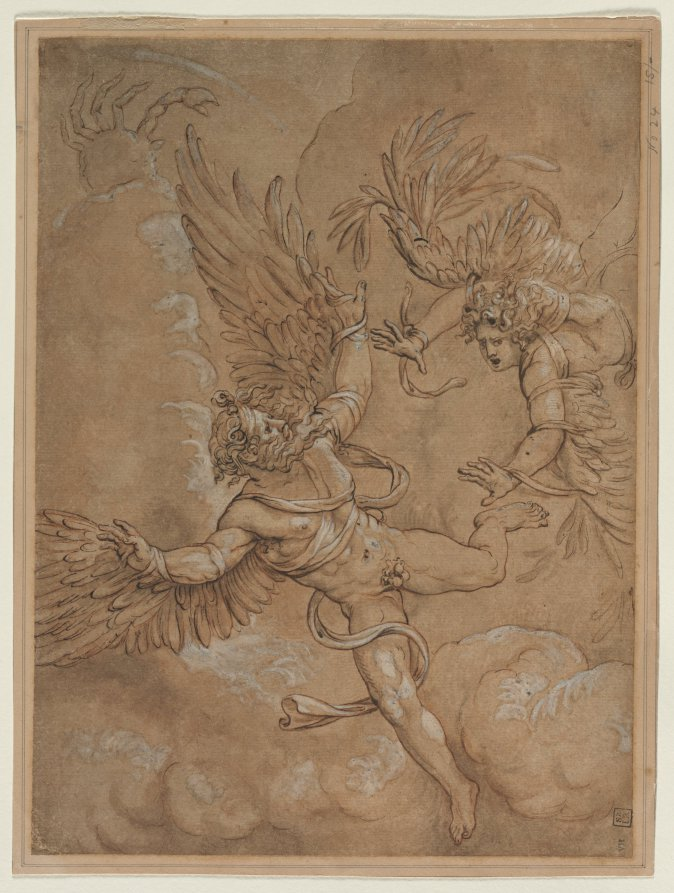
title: Copy after Giulio Romano's Fall of Icarus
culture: Italy, 16th century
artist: after Giulio Romano (Italian, 1492/99–1546)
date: after 1536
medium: pen and brown ink and brush and brown wash over red chalk, heightened with lead white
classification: Drawing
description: Having flown too close to the sun, Icarus plummets from the sky as the wax securing his makeshift wings melts, and the straps unravel. His father Daedelus, who invented the wings, watches in horror as his son begins a deadly fall. Punished for failing to heed his father’s warning and attempting to enter the realm of the gods, Icarus was a moral reminder to Renaissance viewers of human fallibility and the risks of excessive pride.